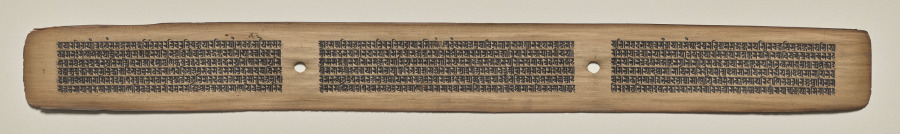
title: Text, Folio 69 (recto), from a Manuscript of the Perfection of Wisdom in Eight Thousand Lines (Ashtasahasrika Prajnaparamita-sutra)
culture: Eastern India, Bihar, Vikramashila Monastery. Painting: Nepal, Kathmandu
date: Sunday, September 14, 1119 (year 239 of the Newar Samvat in the month of Ashvina)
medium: gum tempera and ink on palm leaves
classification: Painting